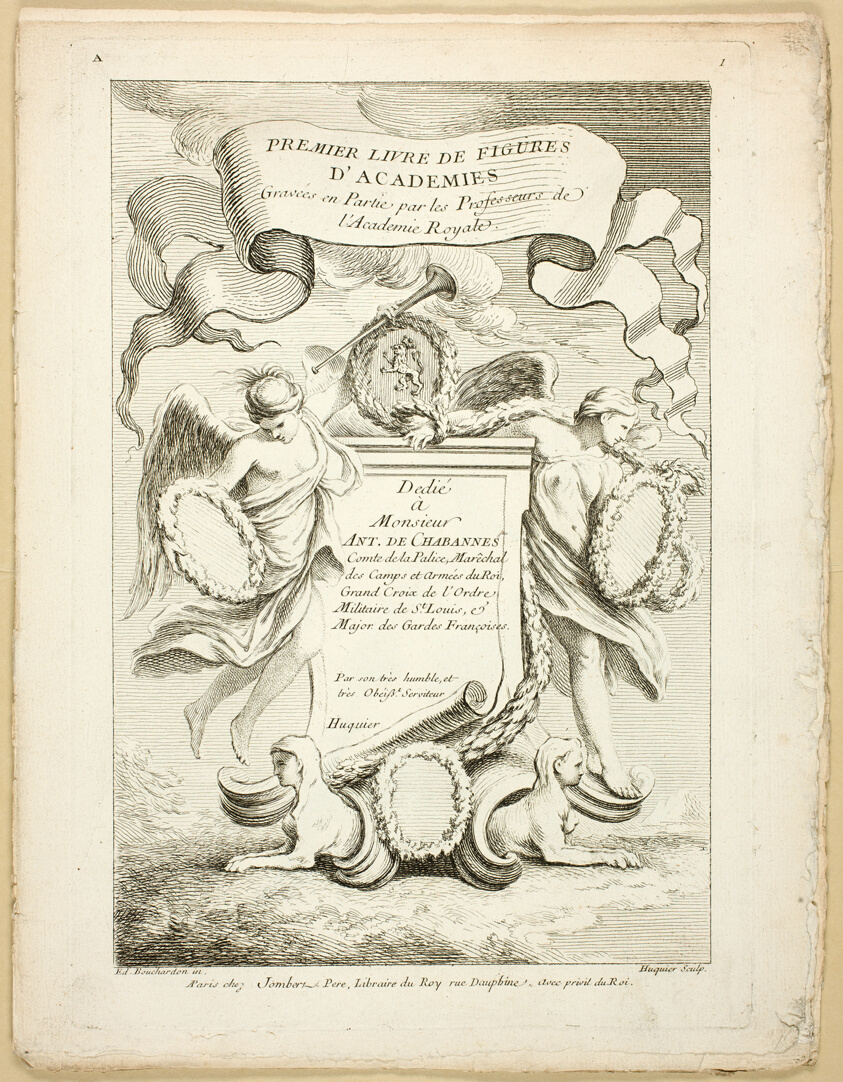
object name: Print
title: Page 1 (Title Page) and Page 28, from Premier Livre de Figures d’Académies Gravées en Partie par les Professeurs de l’Académie Royale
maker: Gabriel Huquier (French, 1695-1772); after Edme Bouchardon (French, 1698-1762); published by Charles-Antoine Jombert (French, 1712-1784)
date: 1737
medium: Etching on ivory laid paper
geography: France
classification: etching; print; prints and drawing